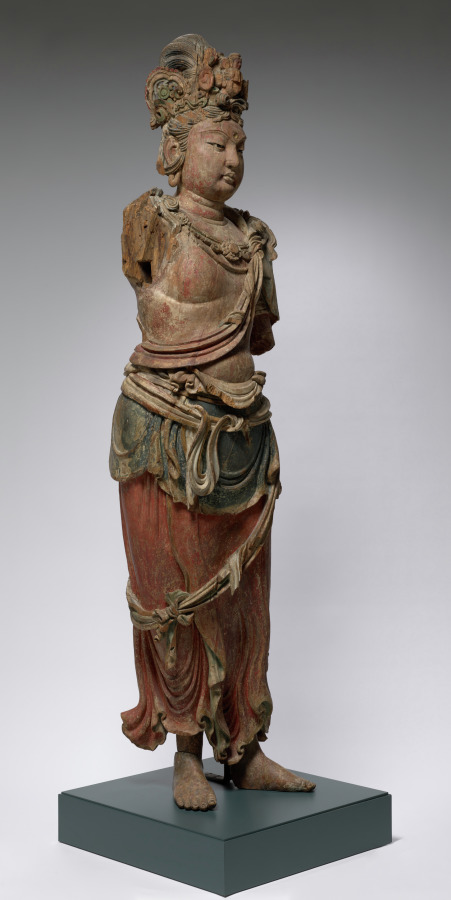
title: Eleven-Headed Guanyin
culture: China, late Northern Song dynasty (960-1127) - Jin dynasty (1115-1234)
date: 1100–1200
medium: wood with polychromy and cut gold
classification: Sculpture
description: The bodhisattva is an enlightened being dedicated to the spiritual awakening of all beings. The compassionate bodhisattva Guanyin, in a variety of manifestations, is probably the most popular deity of worship in Chinese Buddhism. In the Esoteric Buddhist form shown here, this standing Guanyin has a total of eleven heads, with smaller ones above the principal head. The uppermost head represents the Buddha Amitabha, to whom he is closely related. The eleven heads symbolize the Buddha’s steps on the path to enlightenment.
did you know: This Guanyin is carved from a single block of willow (genus Salix sp.).